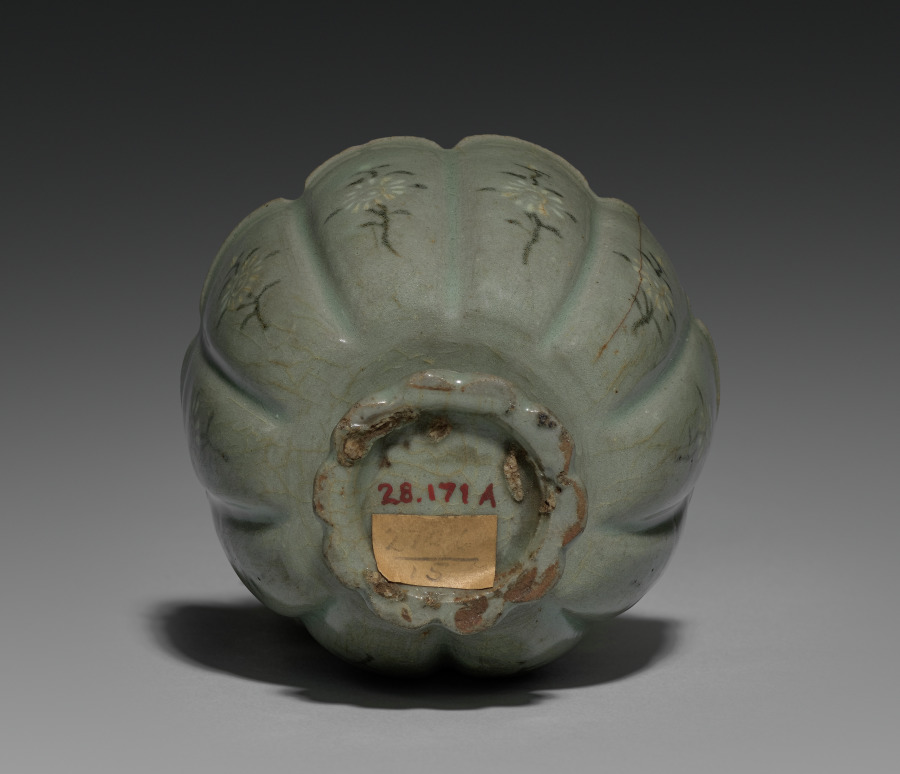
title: Cup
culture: Korea, Goryeo dynasty (918–1392)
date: 1100s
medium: Celadon ware with inlaid white and black slip decoration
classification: Ceramic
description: This celadon wine cup is inlaid with a chrysanthemum pattern that reflects Koreans’ enjoyment of both the poem "Drinking Wine" and the blessings of longevity associated with the Double Nine Festival. The flower design on the saucer is less delicate than the cup, as the cup and saucer were originally from different sets; they were later paired together after each lost its mate.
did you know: Elites of the Goryeo period are known for their love of drinking tea and wine. This type of delicate-looking cup stand not only made their drinking experience more enjoyable, but also showed their refined taste.